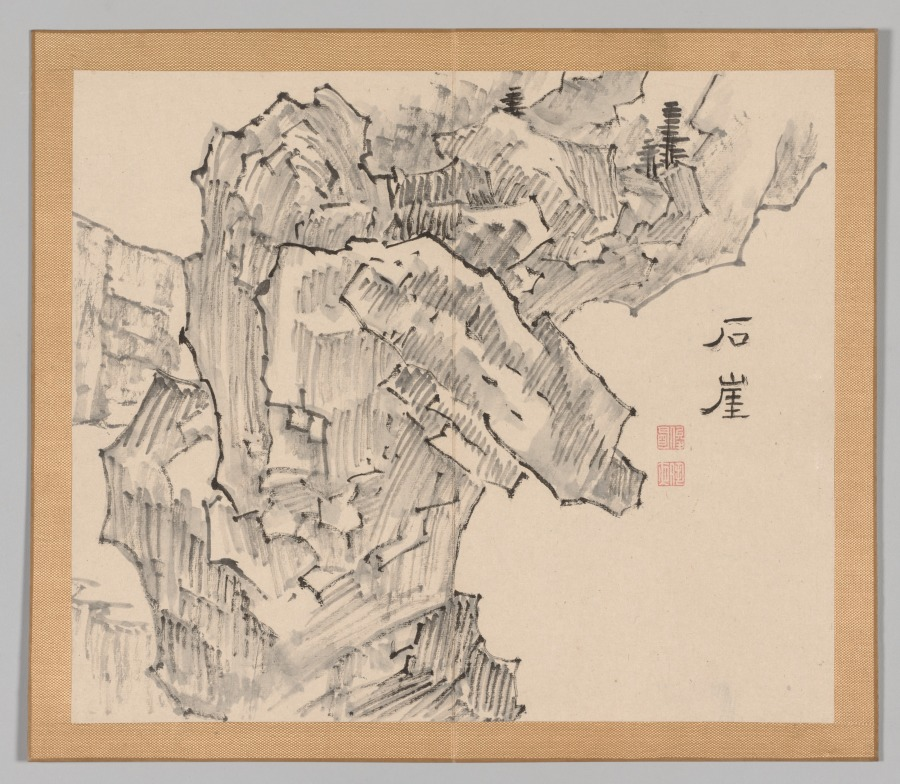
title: Reverberations of Taiga, Volume 1 (leaf 19)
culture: Japan, Edo period (1615–1868)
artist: Aoki Shukuya (Japanese, d. 1802)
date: mid- to late 1700s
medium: double-leaf from a pair of albums; ink and light color on paper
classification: Portfolio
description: Traditionally, young painters in Japan began their studies with an established master-painter. The master's compositions invariably became models that the apprentice copied to learn various ink and brush techniques. Shukuya was a pupil of the famous Kyoto artist Ikeno Taiga, whose style is reflected in these sketches of rocks, trees, and mountains.